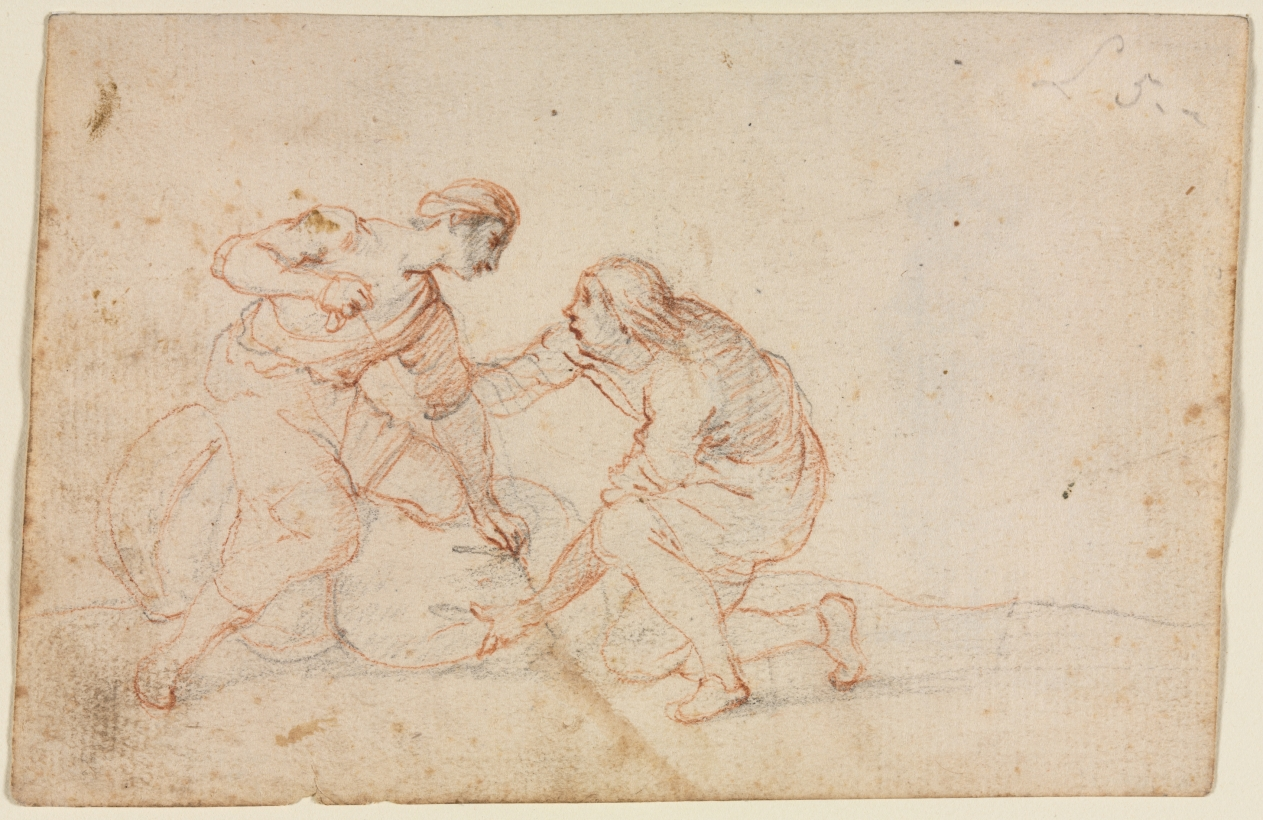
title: Two Men Tying a Bundle (recto)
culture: France, 17th century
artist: Anonymous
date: 1600s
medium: graphite and red chalk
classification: Drawing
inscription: upper right, in graphite: L 5 - (partially erased)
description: In September 1883 Van Gogh left the bustling Dutch city of The Hague in search of open countryside in which to paint. He moved to Drenthe, a village in northeastern Netherlands that was virtually untouched by the Industrial Revolution. He described the barren terrain as supremely beautiful and serene: "What tranquility, what expanse, what calmness in this nature." With a limited palette of steely greens and cool blues, Van Gogh masterfully portrayed one of the region’s expanses of heath—"a vast plane vanishing into infinity"—illuminated by the lilac hues of the evening sky.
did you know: Vincent van Gogh made this watercolor just over a year after beginning to work professionally as an artist.